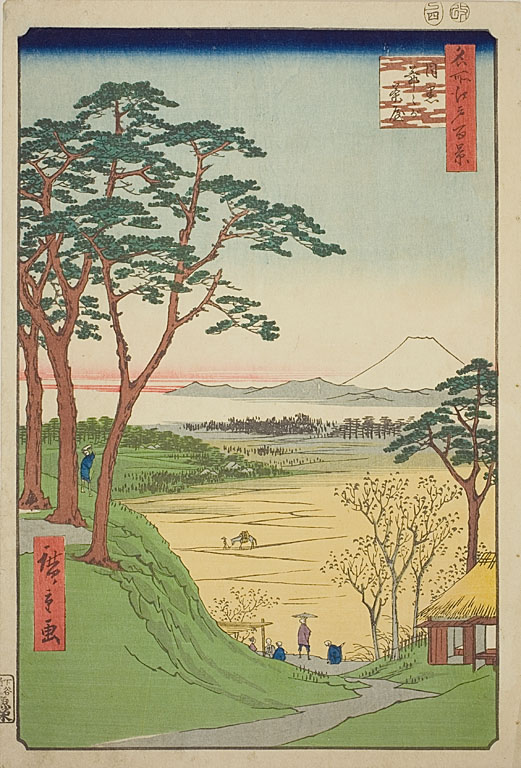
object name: Print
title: Old Man’s Teahouse, Meguro (Meguro Jijigachaya), No.84 from the series “One Hundred Famous Views of Edo (Meisho Edo hyakkei)”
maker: Utagawa Hiroshige (Japanese, 1797-1858)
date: 1857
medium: Color woodblock print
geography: Japan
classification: woodblock print; print; asian art